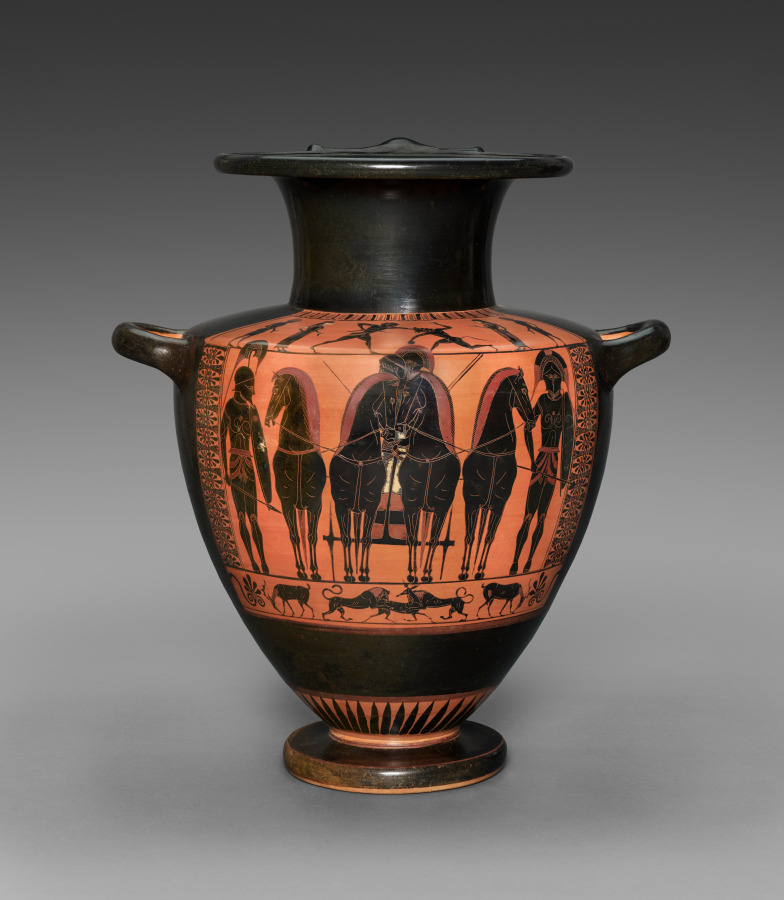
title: Black-Figure Hydria (Water Vessel): Frontal Quadriga (Body); Theseus and Minotaur (Shoulder)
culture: Greece, Attic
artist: attributed to Antimenes Painter (Greek, Attic, active c. 530–510 BCE)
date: c. 520 BCE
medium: ceramic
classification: Ceramic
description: Although their subjects differ, the three fields of figured decoration on this vessel relate to one another metaphorically through the theme of victory. Just as Theseus defeats the Minotaur on the shoulder, two lions converge on a deer in the predella (the small, lowermost panel). In the largest panel, victory is still to come, presumably for all three warriors shown: one in the chariot behind his driver, and one on foot on either side. Somewhat unusually, two of the warriors look directly out at the viewer, their frontal faces an interesting complement to the much more common frontal chariot.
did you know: This type of water vessel, a hydria, takes its name from hudor, Greek for water (and still familiar in the English root hydro).